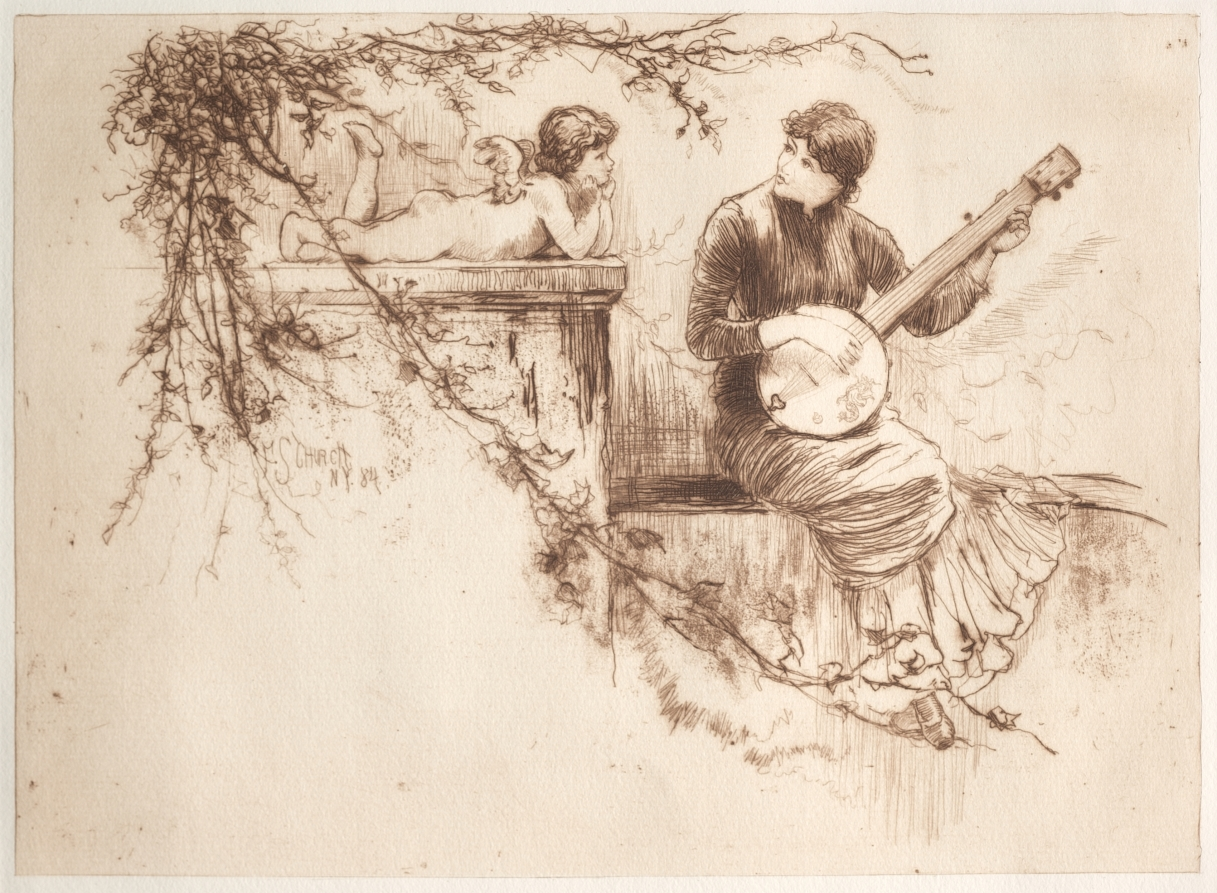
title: A Symphony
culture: America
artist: Frederick Stuart Church (American, 1842–1924)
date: 1884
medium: etching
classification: Print